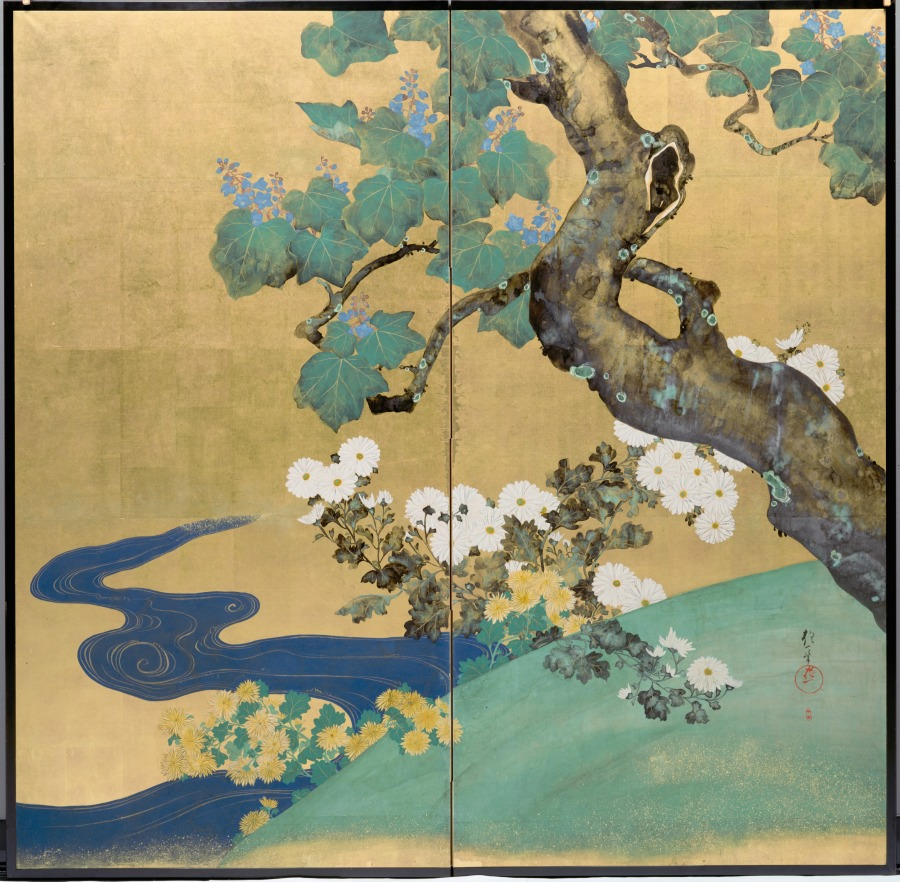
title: Paulownias and Chrysanthemums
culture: Japan, Edo period (1615–1868)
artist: Sakai Hōitsu (Japanese, 1761–1828)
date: early 1800s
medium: Two-panel folding screen; ink and color on gilded paper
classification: Painting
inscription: inscription at right reads: "Hoitsu hitsu" (painted by Hoitsu); within circle: (Hoitsu); tiny gourd shape below encloses two characters "Bun-zen," Hoitsu's name.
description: In this screen, Sakai Hōitsu expertly deployed a painting technique called “dripping-in” (tarashikomi). Ink and color dripped on the surface, and allowed to pool there, created the illusionistic effect of lichen-dotted tree bark and twisted chrysanthemum leaves. Paulownia and chrysanthemum are signifiers of late spring and early autumn as well as emblems of the Japanese imperial house. Paulownia also has medicinal properties and associations with fortitude, while chrysanthemum symbolizes good government.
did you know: Hōitsu often painted two-panel folding screens for urban clients residing in smaller spaces. A painting after this one in the Itabashi Museum in Tokyo shows an extended composition across a pair of two-panel screens.